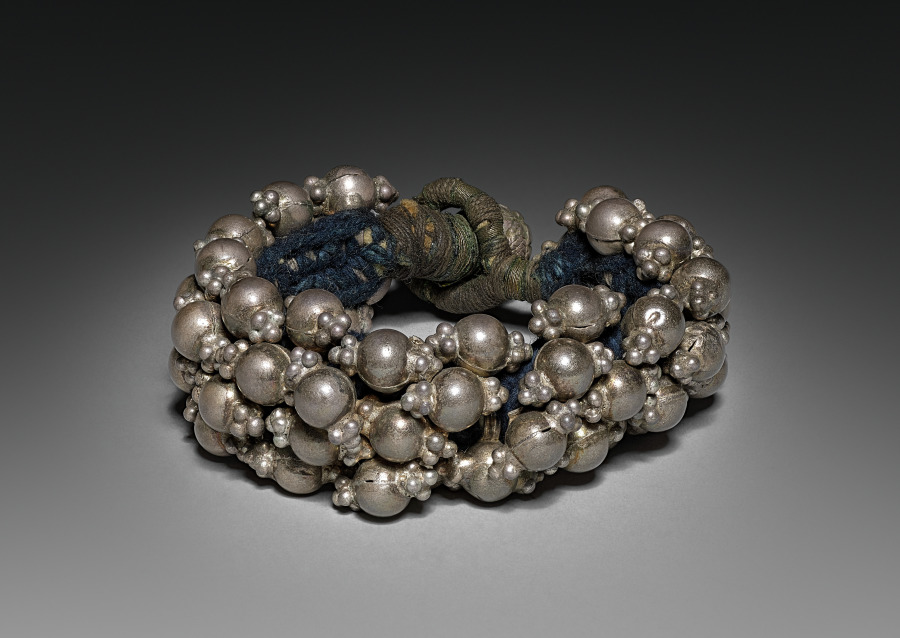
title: Bracelet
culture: India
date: 1800s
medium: silver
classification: Jewelry